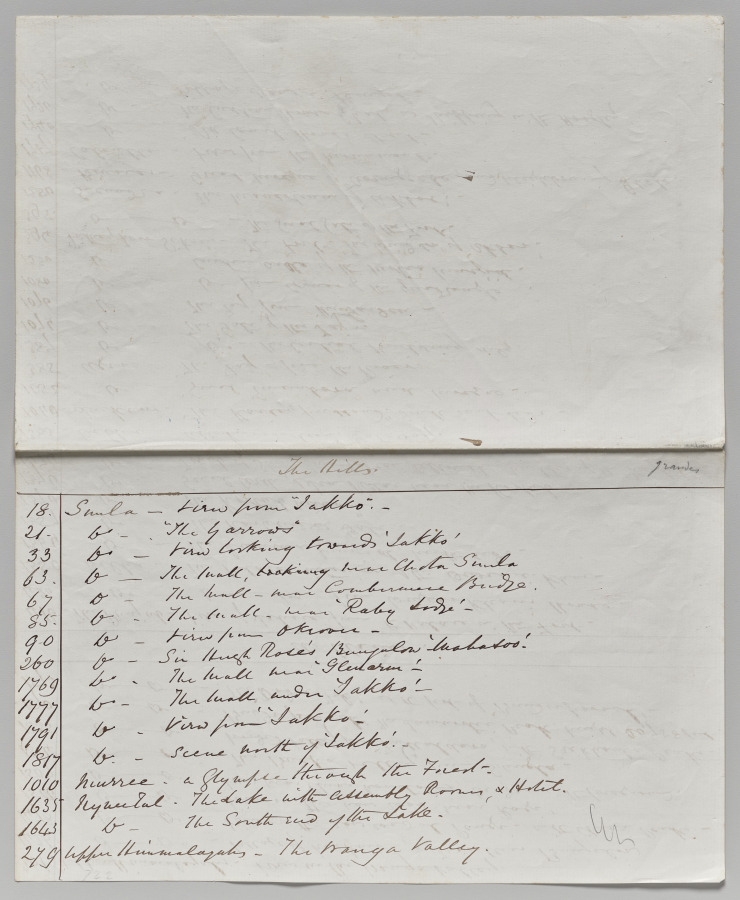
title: Photographs of Northern India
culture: England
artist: Samuel Bourne (British, 1834–1912)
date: 1863–70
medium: Album of 50 albumen prints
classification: Bound Volume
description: The 50 images in this album, all taken in the 1860s, move from the hill towns of the Himalayas down to cities including Lahore (now in Pakistan), Delhi, Lucknow, Agra, Benares (now Varansi), and Calcutta (now Kolkata). Architectural studies of major monuments offer valuable historical records of what sites such as the Taj Mahal and the imperial mosque of the Mughal emperors in Delhi looked like before twentieth-century restorations.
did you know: Samuel Bourne, the author of most the images in this album, was a banker in England before he moved to India to become a professional photographer.